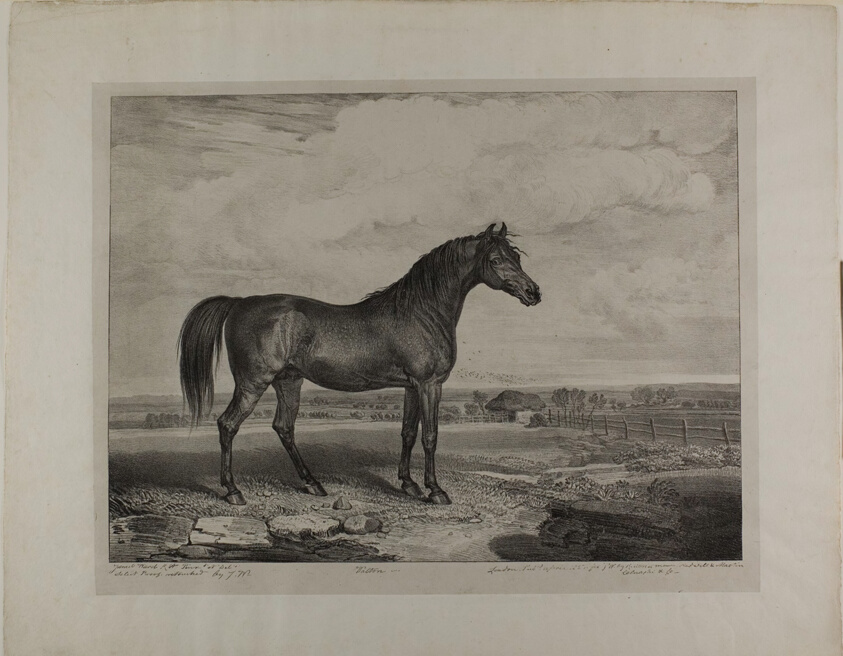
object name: Print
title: Walton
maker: James Ward (English, 1769-1859)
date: 1823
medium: Lithograph on ivory chine, laid down on off-white wove paper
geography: England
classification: lithograph; print; prints and drawing